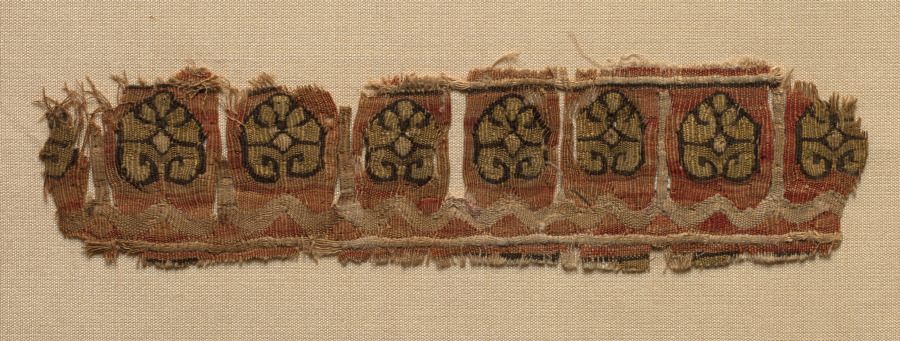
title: Fragment of a Tiraz-Style Textile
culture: Egypt, Fatimid period, Caliphate of al-Hafiz or later, AH 524-565, 12th Century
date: 1130 – 1169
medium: tapestry (originally inwoven in a tabby ground); linen and silk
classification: Textile